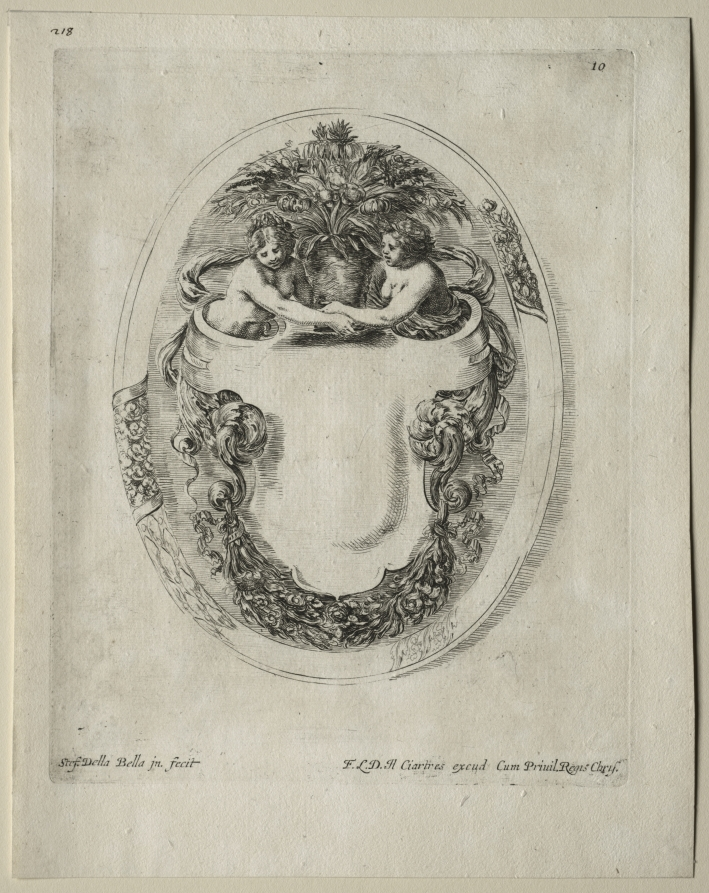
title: Collection of Various Caprices and New Designs of Cartouches and Ornaments: No 10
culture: Italy, 17th century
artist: Stefano Della Bella (Italian, 1610–1664)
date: 1646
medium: etching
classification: Print